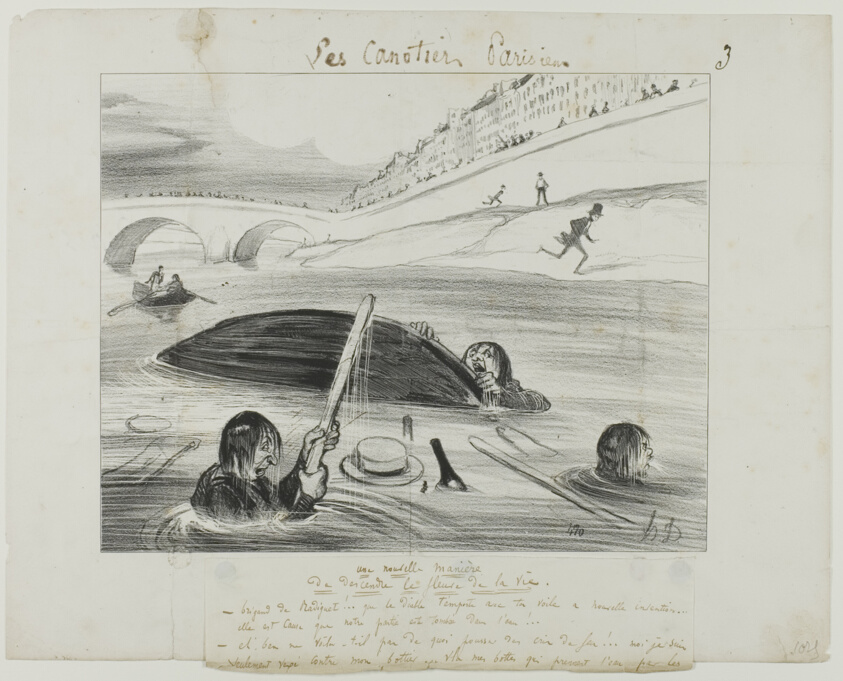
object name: Print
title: A New Way to Float Down the River of Life, plate three from Les Canotiers Parisiens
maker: Honoré-Victorin Daumier (French, 1808-1879)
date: 1843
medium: Lithograph in black, with additions in pen and brown ink and caption in pen and brown ink, on ivory wove paper, tipped onto ivory wove paper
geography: France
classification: lithograph; print; prints and drawing